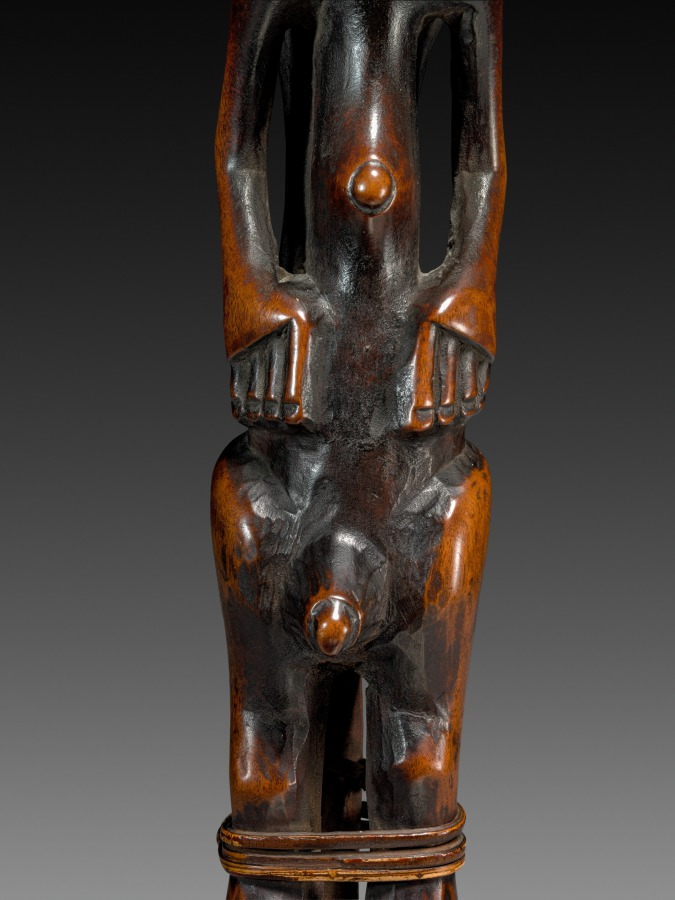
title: Bow Stand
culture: Africa, Central Africa, Democratic Republic of Congo, Luba-style carver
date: 1800s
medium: Wood and plant fiber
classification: Sculpture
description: A powerful symbol of the Luba king, bow stands were ceremonial objects that resided within the king’s private vicinity in the palace and were never displayed in public. Typically, bow stands depict a female figure, but the sculptor has carved a figure with ambiguously gendered human traits. This is a symbolic depiction that may allude to how divine rulers (mulopwe) were believed to have both “male” and “female” character traits, which allowed this sculpture to act as a vessel for spirits of any gender.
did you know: The shape of this wooden bow stand is based on a more practical version in metal used by hunters.